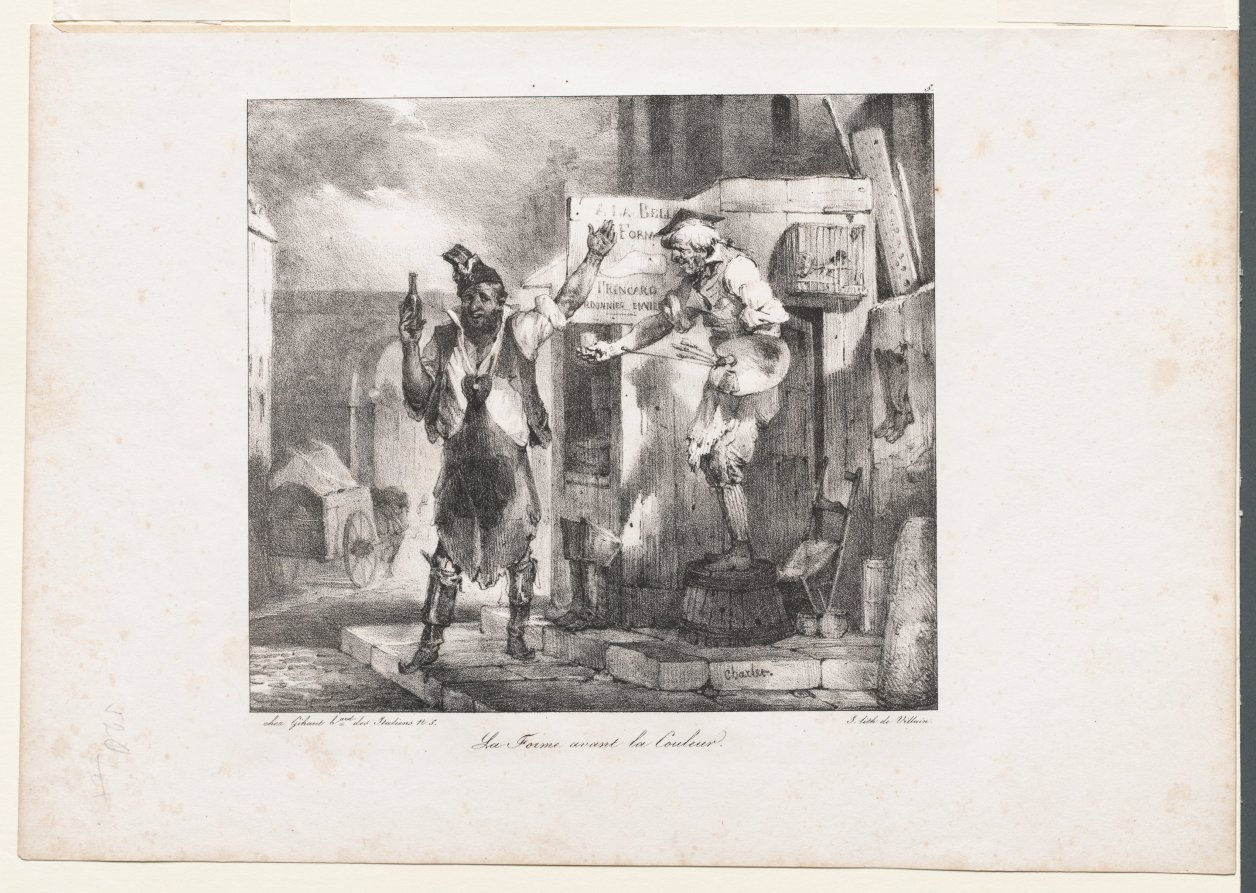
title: Lithographic Sketches by Charlet: Form before Color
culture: France, 19th century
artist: Nicolas Toussaint Charlet (French, 1792–1845)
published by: Villain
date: 1823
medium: lithograph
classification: Print